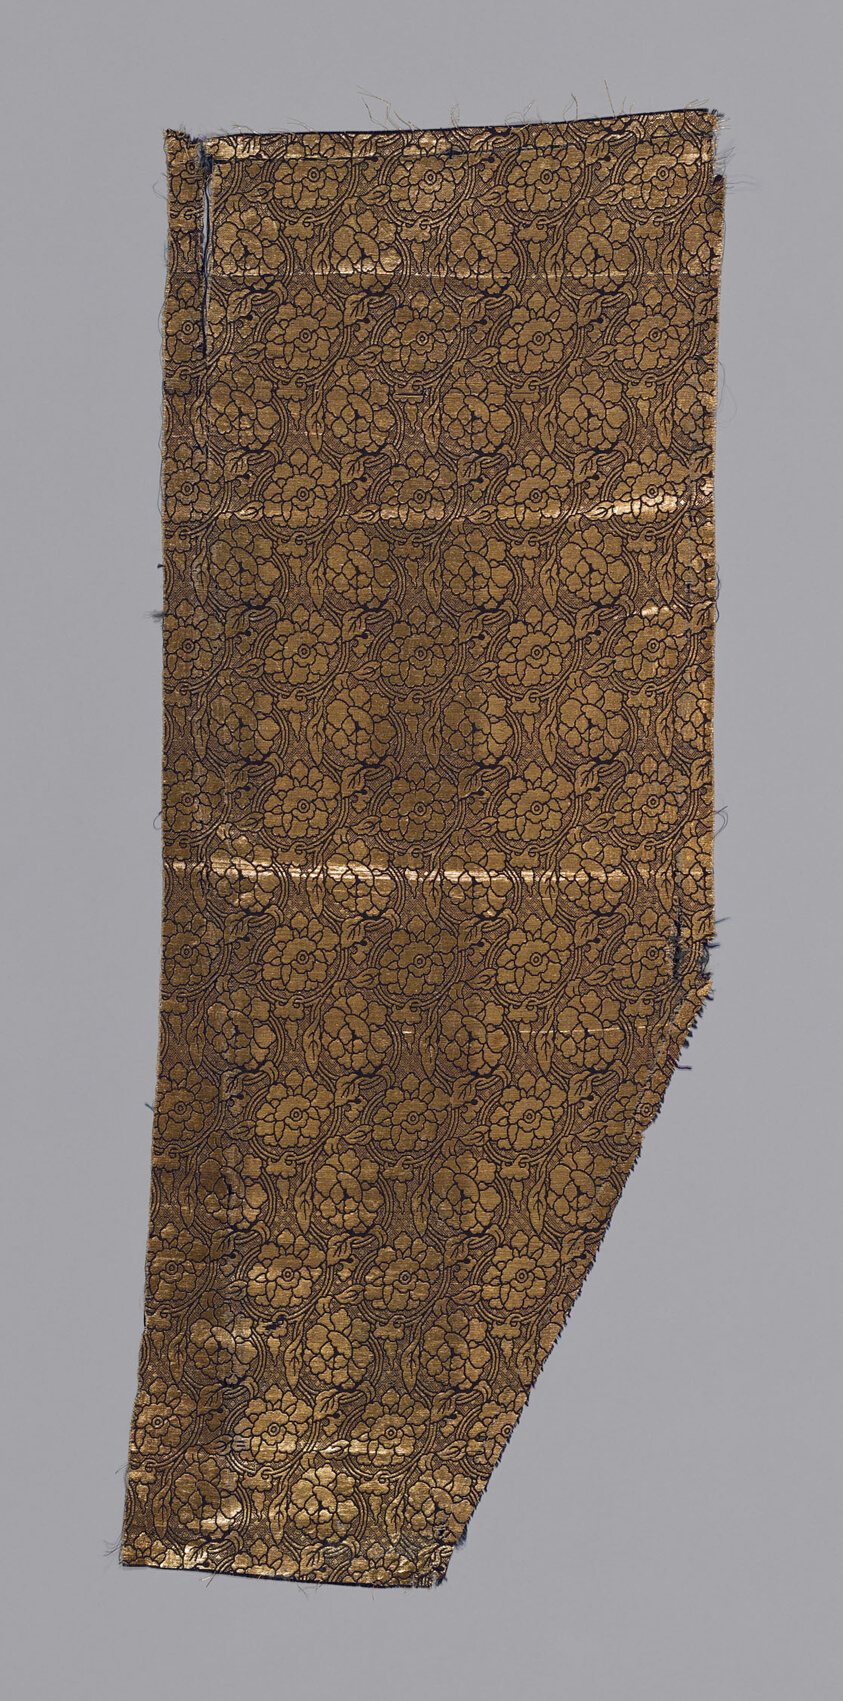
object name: Textile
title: Panel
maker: Japan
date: 18th century, late Edo period (1789–1868)/ Meiji period (1868–1912)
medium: Plain compound twill, silk, and gilt paper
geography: Japan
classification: textile; weaving